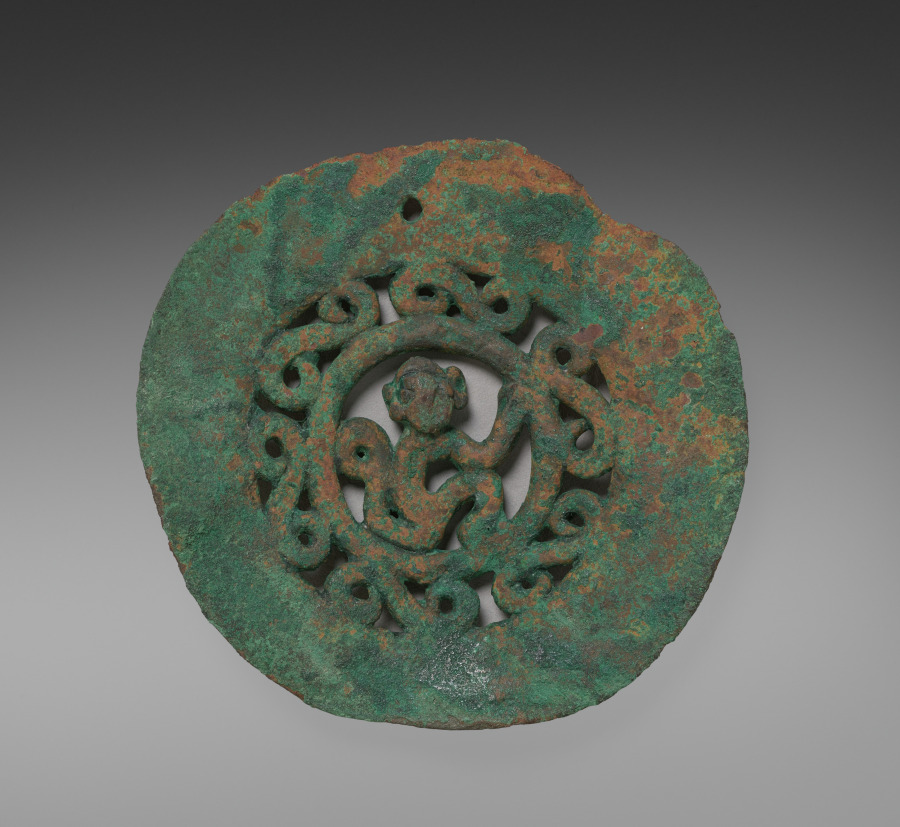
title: Medallion, beads, and spindle whorls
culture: Central Andes, North Coast, Chimú (medallion)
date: 1000–1532 (medallion)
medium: bronze, copper, silver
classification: Jewelry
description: This medallion and dozens of smaller beads and spindle whorls arrived at the museum strung on modern cord. Pierced with a hole at the top, it could have been suspended from a necklace or attached to a backing, such as a textile. It comes from Peru’s north coast and was made in the late pre-Hispanic period; the dates of the smaller beads are less clear.